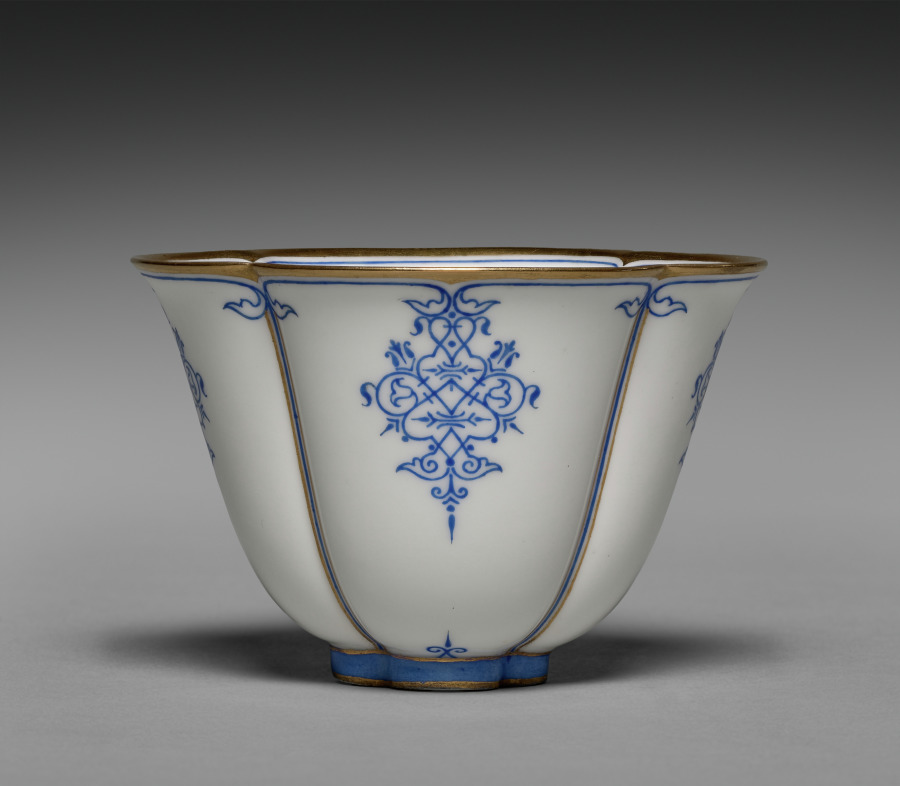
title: Cup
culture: France, Sèvres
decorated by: Guyonnet (French)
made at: Sèvres Porcelain Factory (French, est. 1756)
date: c. 1848–55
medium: hard-paste porcelain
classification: Ceramic